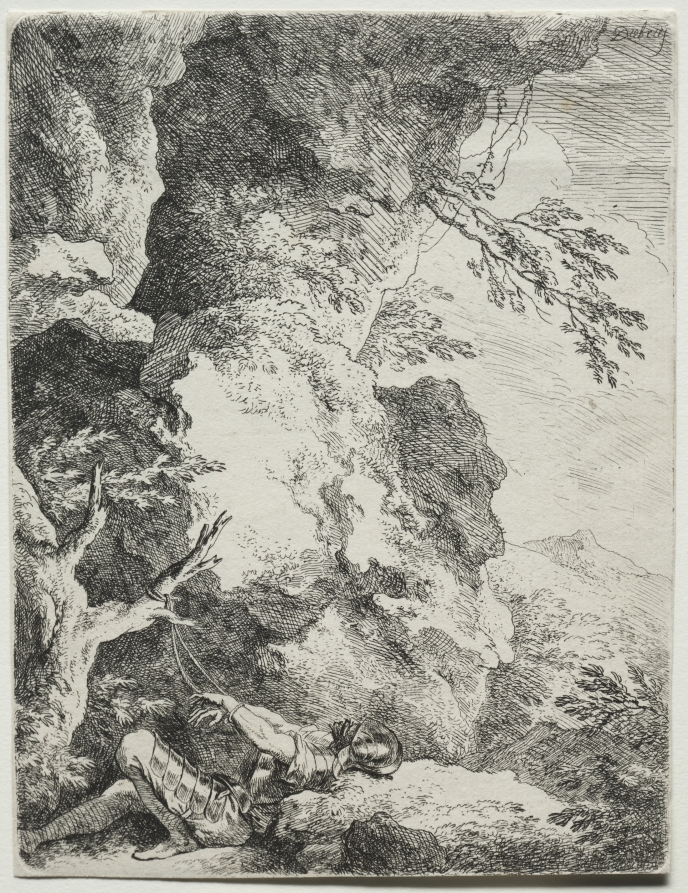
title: St. William, The Hermit Saint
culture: Germany, 18th century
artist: Christian Wilhelm Ernst Dietrich (German, 1712–1774)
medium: etching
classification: Print